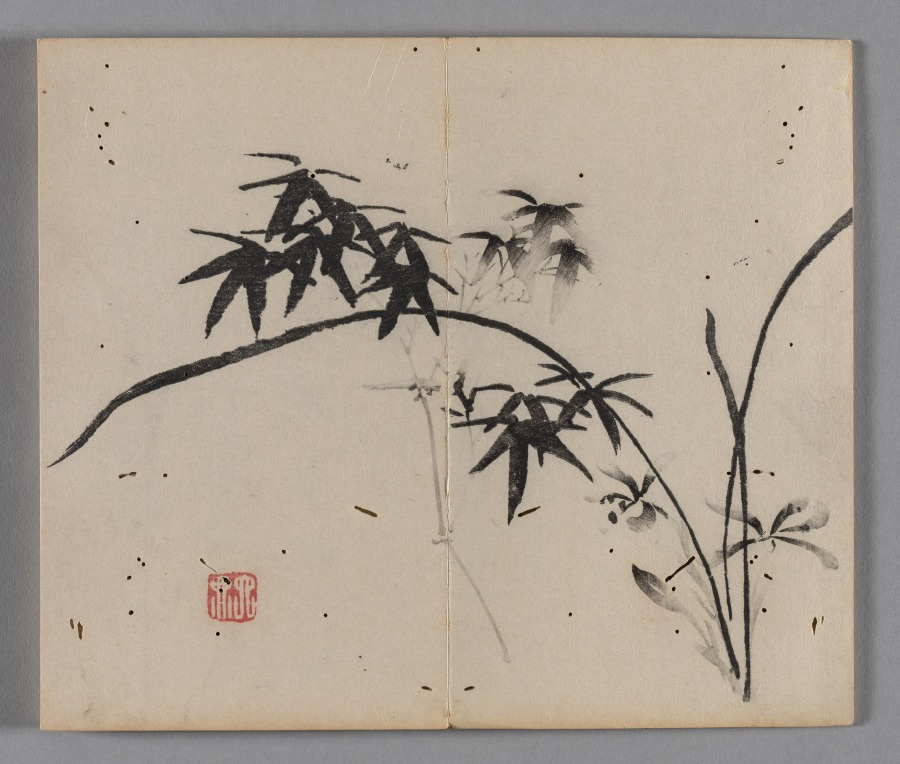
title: Ten Bamboo Studio Painting and Calligraphy Handbook (Shizhuzhai shuhua pu): Miscellaneous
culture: China, Qing dynasty (1644-1911)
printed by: Hu Zhengyan (Chinese, c. 1584–1674)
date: 1633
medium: Woodblock-printed book; ink and colors on paper; first edition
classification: Print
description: Color printing reached a level of perfection in the early 1600s, as seen in this Ten Bamboo Studio Collection of Calligraphy and Painting and the Mustard Seed Garden Manual of Painting (printed 1679 and 1701). The painterly quality, precision in registering (aligning) the woodblocks, and harmonious colors made them the most successful color print editions in Chinese history. Both editions were printed and compiled in Nanjing, spread nationwide, and had a great impact on the arts in Japan and Korea.